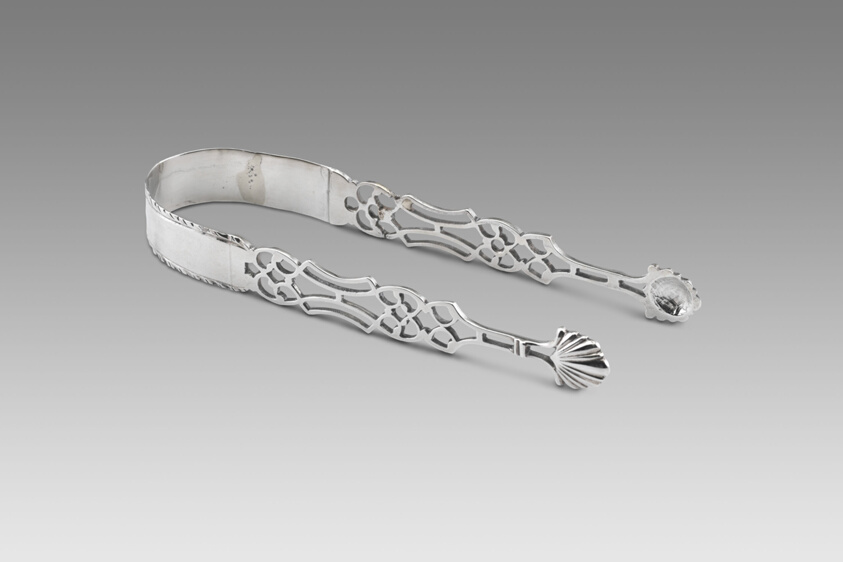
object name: Metalwork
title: Sugar Tongs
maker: Simeon Coley; American, active 1766–1769; New York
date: 1766–69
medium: Silver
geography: New York City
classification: utensil for serving food; utensil; silver; american decorative arts; american arts; decorative arts